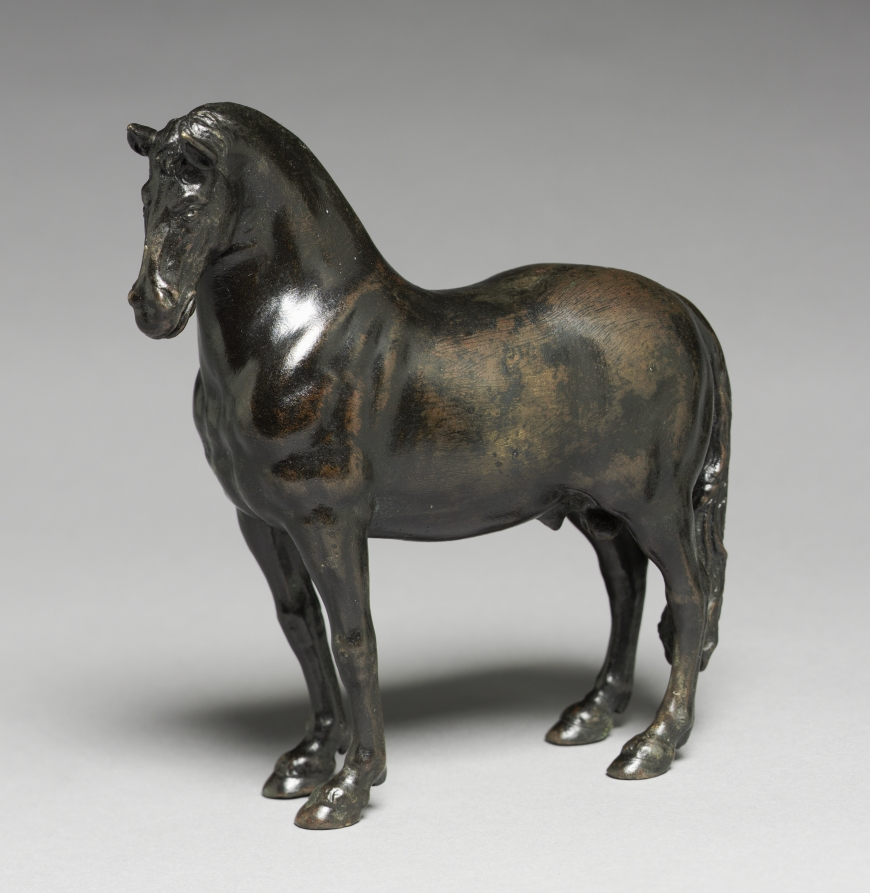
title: Horse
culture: Germany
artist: possibly cast after a model by Francesco Fanelli (Italian, 1661)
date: 1630s or later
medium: bronze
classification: Sculpture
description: Shortly after its acquisition, this work was published as a model for an equestrian monument of Emperor Maximilian by Gregor Erhart, cast by one of Maximilian's bronze founders in Augsburg. Recent scholars have questioned the connection to Erhart and have placed it closer to Fanelli, due to the rendering of the horse's head and the waxy overall feel of the modeling. Related works in Braunschweig and (formerly) Berlin already carry attributions to a Fanelli model.